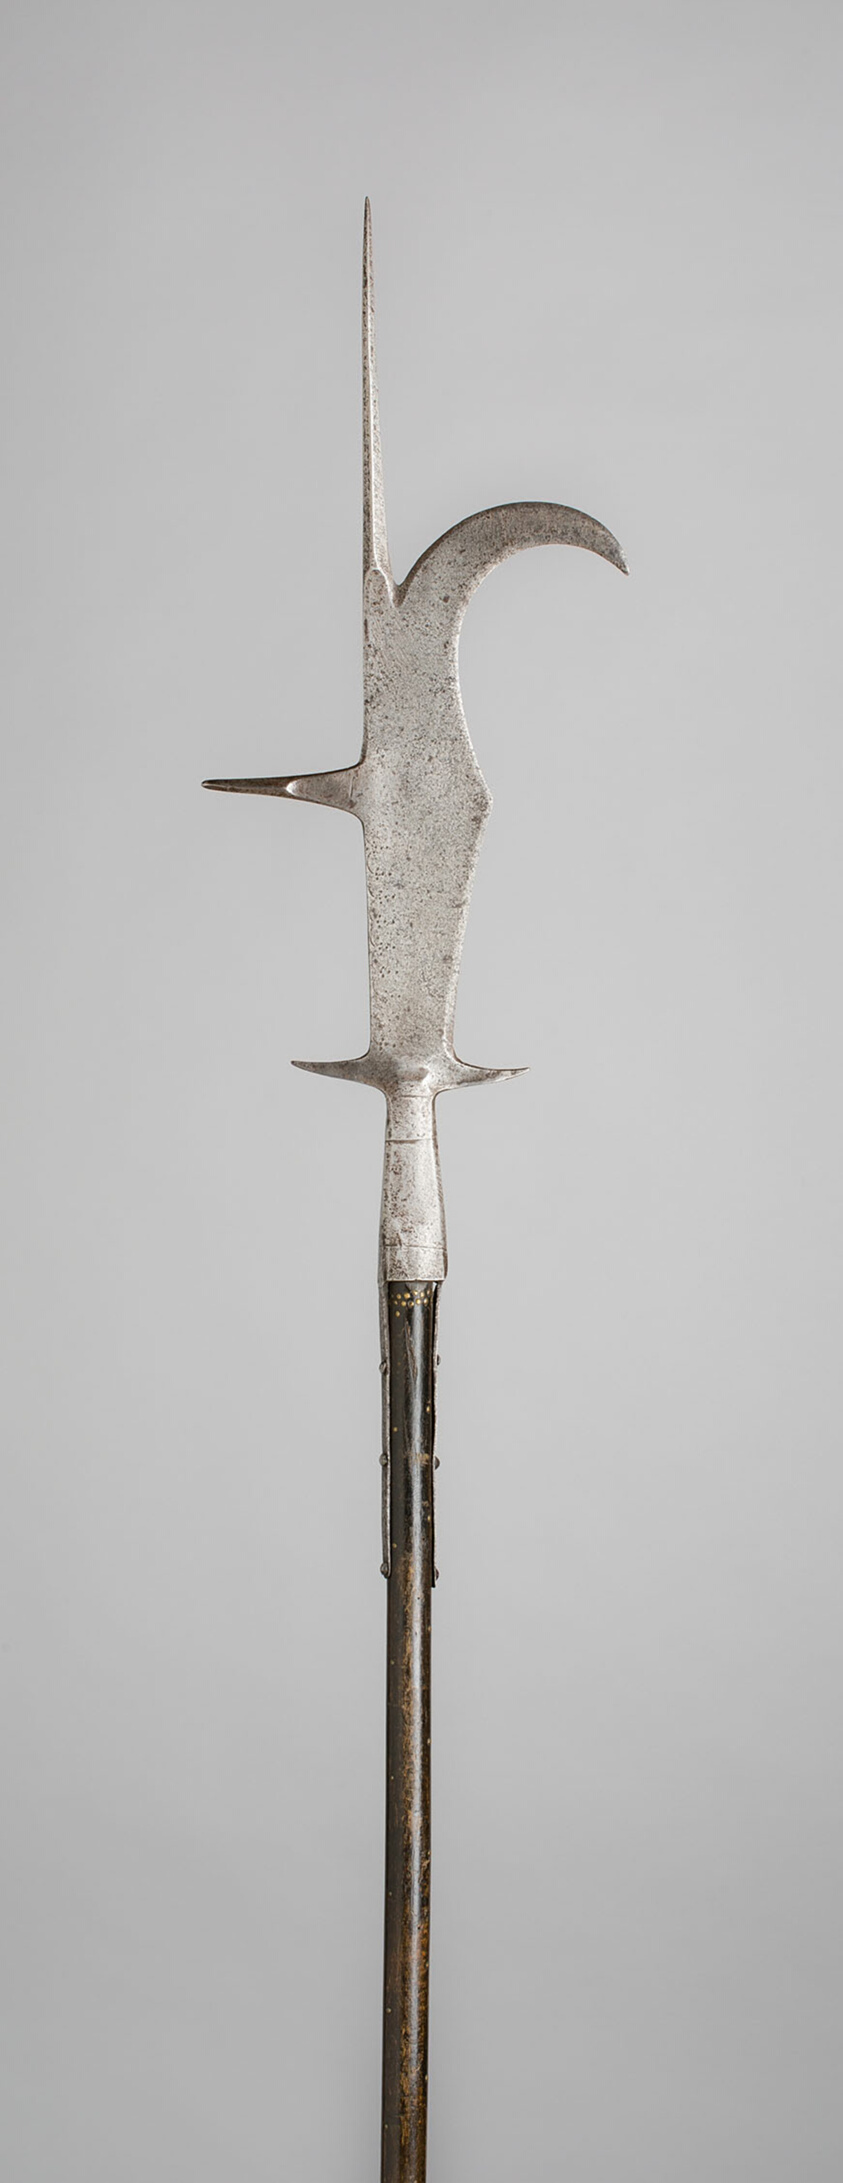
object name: Arms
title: Bill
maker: Italian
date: c. 1500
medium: Steel, wood, and brass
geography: Italy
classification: edged weapon-staff; arms; arms and armor